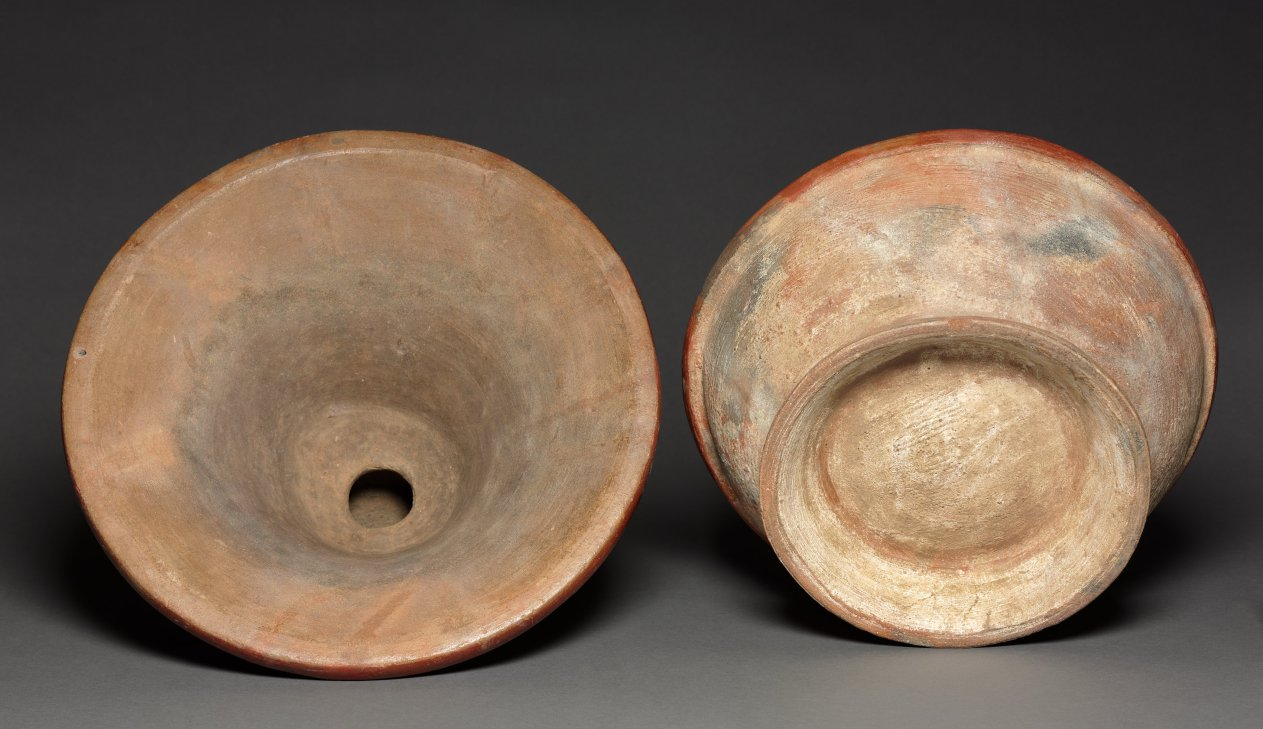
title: Lidded Bowl with Iguana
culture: Costa Rica, Southern Nicoya region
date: c. 600–1100 (Thermoluminescence date, 995–1395)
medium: ceramic, slip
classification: Ceramic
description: At the time of the Spanish conquest in the 16th century, Costa Rican mythology linked iguanas to the sky and to rulers. The earlier makers of this vessel left no written records, but they may have had similar beliefs. The lizard poses as though basking in the sun, a celestial body, and assumes an aggressive stance that could be likened to a ruler's: the teeth and chin under the dewlap are displayed, Also, fine ceramics like this were buried in the graves of the high-status dead, some of them certainly leaders of the several groups that competed in the area.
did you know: Green iguanas can grow to be over 6 feet long.